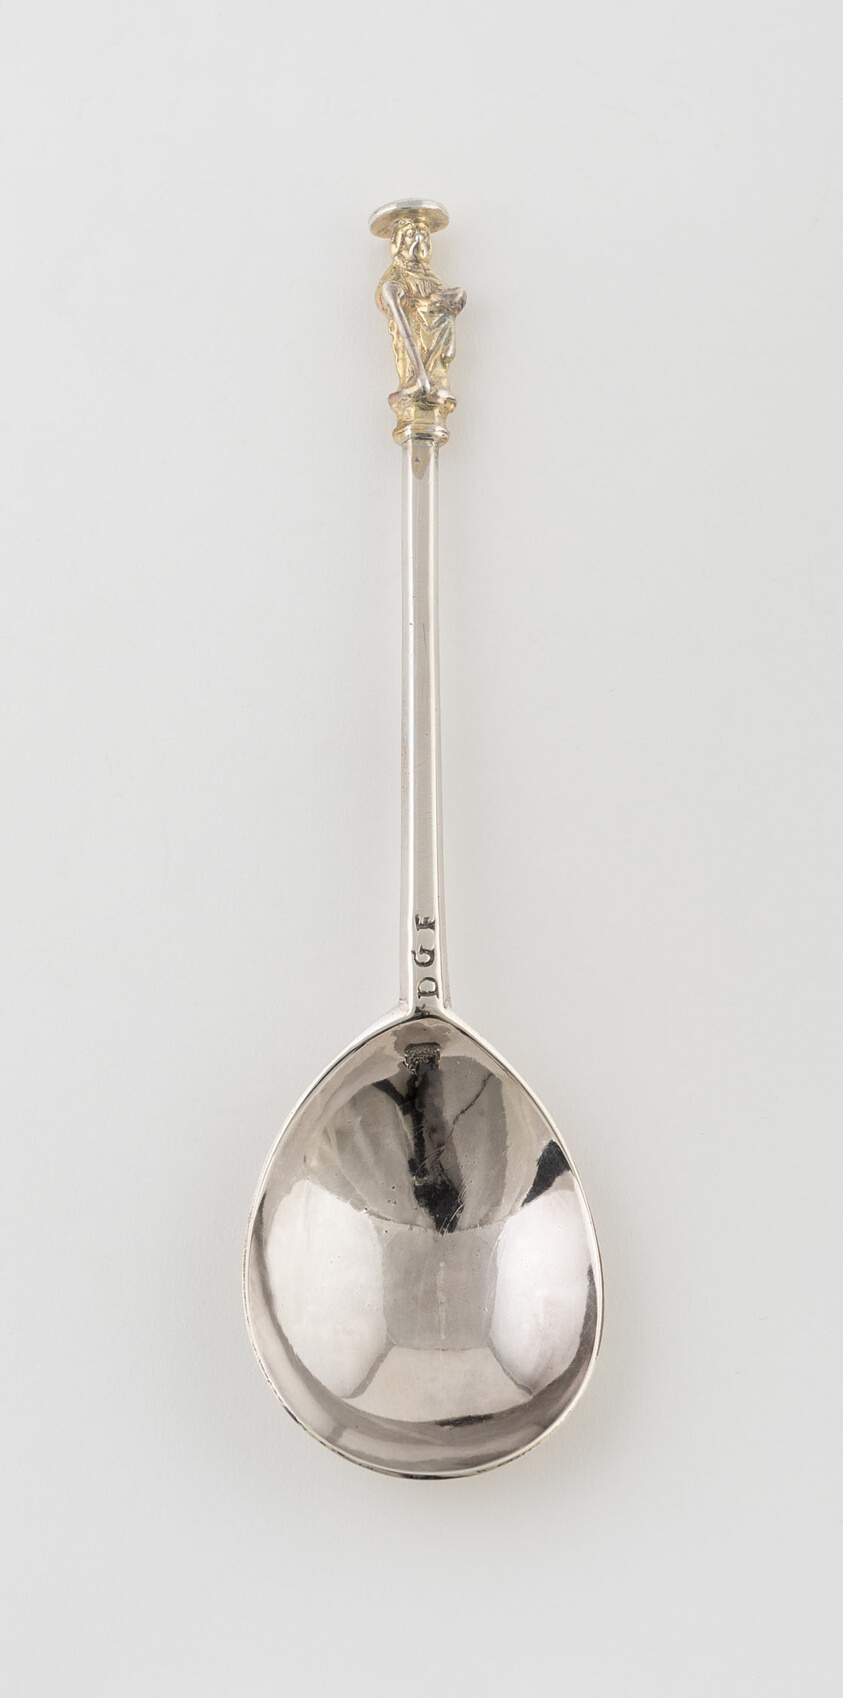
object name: Metalwork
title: Apostle Spoon: St. James the Greater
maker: London, England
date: 1599/1600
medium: Silver; figure gilded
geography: London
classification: silver; metalwork; european decorative arts